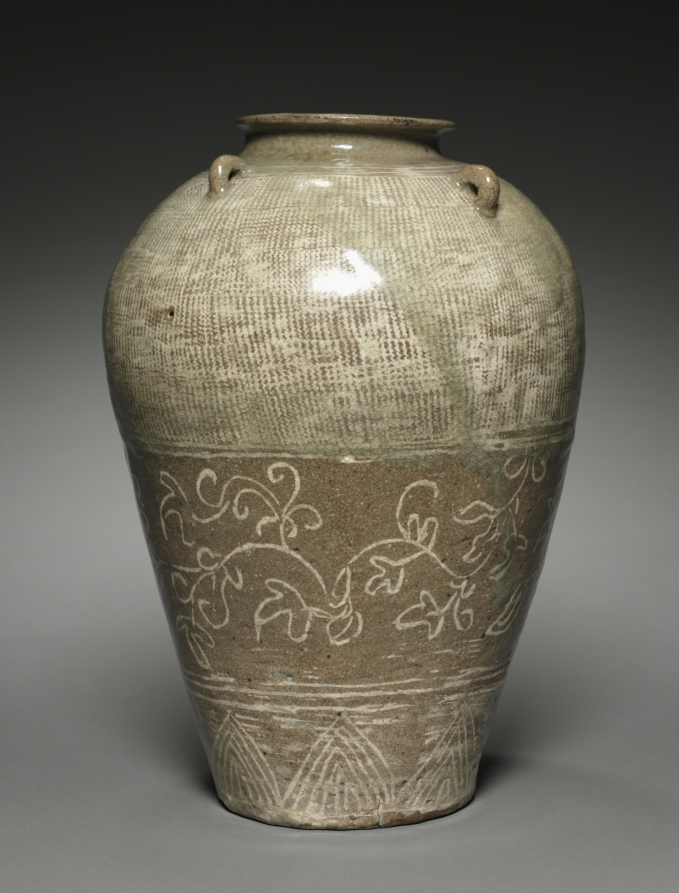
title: Jar with Scroll Design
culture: Korea, Joseon dynasty (1392–1910)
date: 1400s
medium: Buncheong ware with incised, stamped, and slip-inlaid decoration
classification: Ceramic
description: In premodern Korea, a newborn baby’s umbilical cord and placenta were believed to be a symbol of the life force of the fetus and thus kept in a specially arranged burial site. This jar was made exclusively for burying a placenta, a custom practiced by aristocratic families in Korea in the belief that it would bring happiness to the child.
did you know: The tiny ear-like handles located around the jar's shoulder allowing string to pass through were used to keep the lid (now missing) tightly closed.